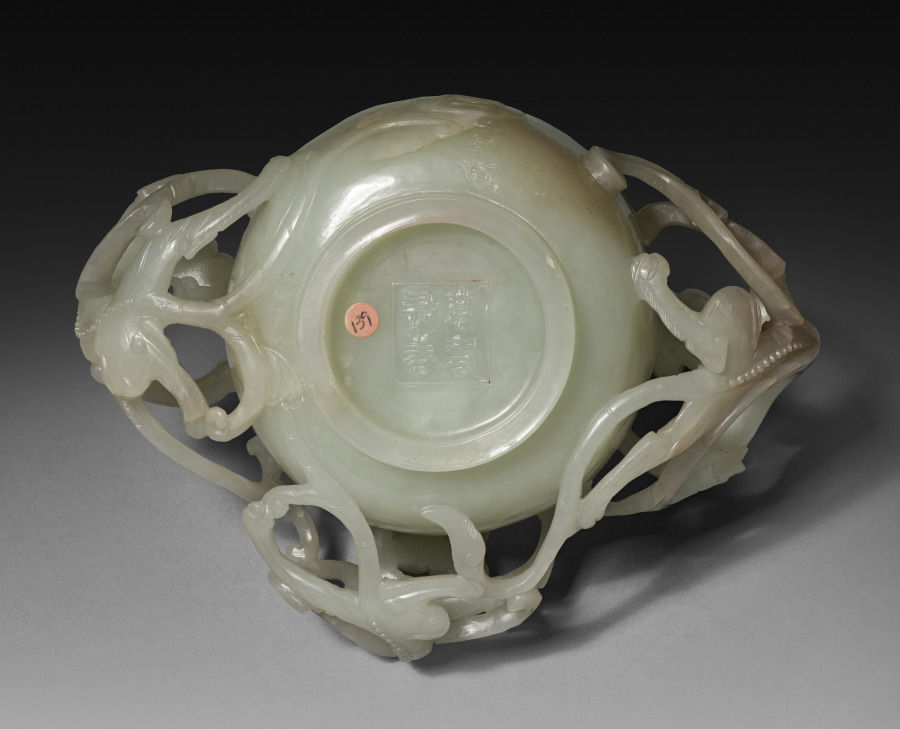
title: Cup with Dragon Handles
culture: China, Qing dynasty (1644-1911), Kangxi reign (1662-1722)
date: 1662–1722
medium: Pale gray-green white jade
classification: Jade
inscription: 萬壽長春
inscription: 壽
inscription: 子剛造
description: Three dragons, auspicious symbols for good fortune, grasp the rim of this bowl. A large shou (longevity) character is visible on the outside wall. Drinking cups with dragon handles were elite luxuries. The yellowish-white color and refined techniques are characteristic of Suzhou workshops that served the court, scholar-officials, and the merchant class. The optimistic attribution to Lu Zigang (late 1500s), a jade master recorded to have been active in Suzhou, suggests that its maker used the master’s name to attract wealthy clients eager to demonstrate their refined taste and connoisseurship.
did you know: Auspicious inscriptions on the base and front of the jade cup convey wishes for longevity.